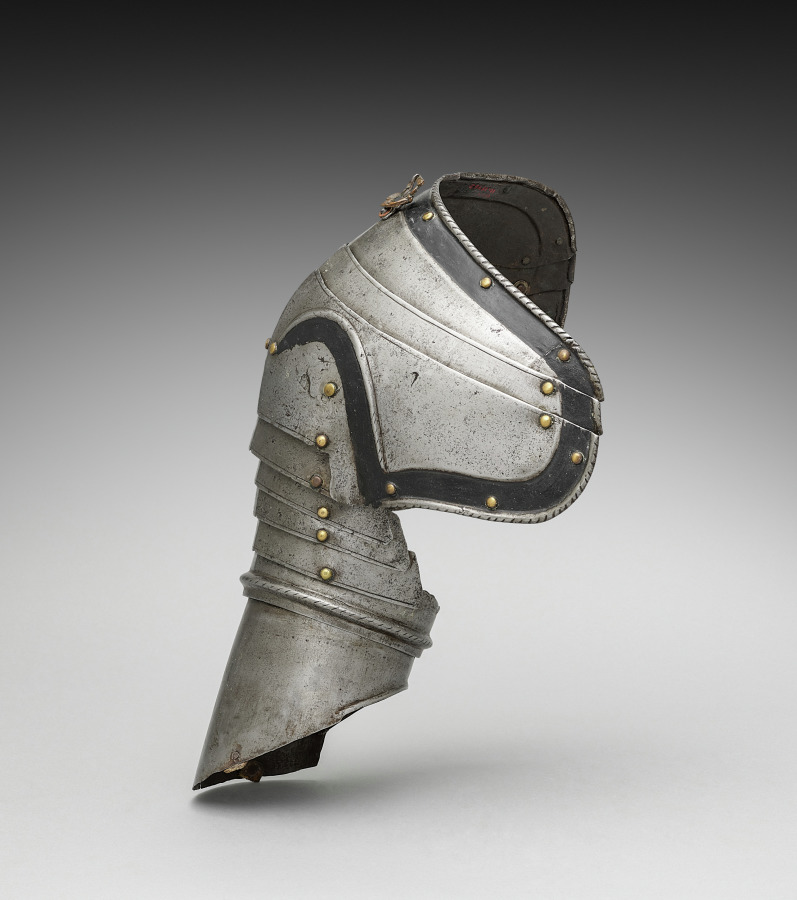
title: Right Pauldron with Rerebrace (upper cannnon)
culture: Germany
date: c.1550–1570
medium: iron, steel, leather and brass rivets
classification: Arms and Armor